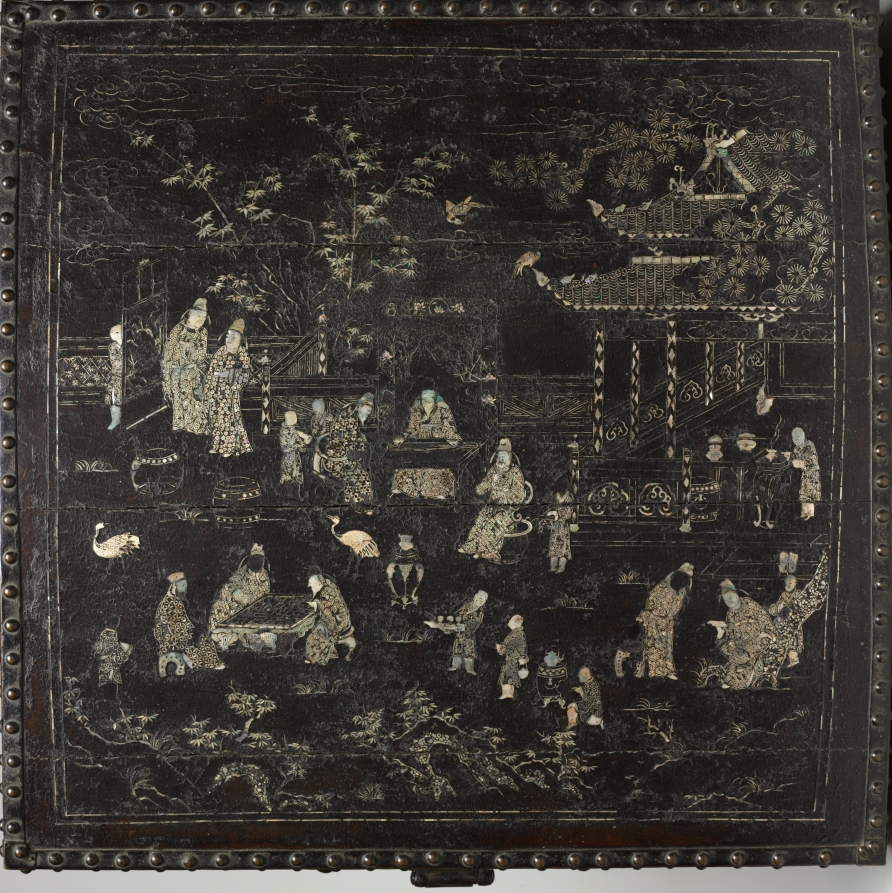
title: Chest for Storing Garments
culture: China, Ming dynasty (1368–1644)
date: 1400s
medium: lacquered wood with mother-of-pearl inlay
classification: Lacquer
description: This precious lacquer box is decorated with bird and plant motifs and figures in mother-of-pearl inlay. The decoration depicts the leisurely pursuit of scholars in nature and a garden setting. Scholars play the board game weiqi, have philosophical conversations, pluck a qin (a zither-like instrument with strings), and read books. Lacquer chests of this type were used to store garments neatly folded along their straight seams. The mother-of-pearl inlay from shells is a technique that was typically practiced by craftsmen in Hangzhou and other parts of southeast China near the sea.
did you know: Lacquer chests of this type were used to store garments.